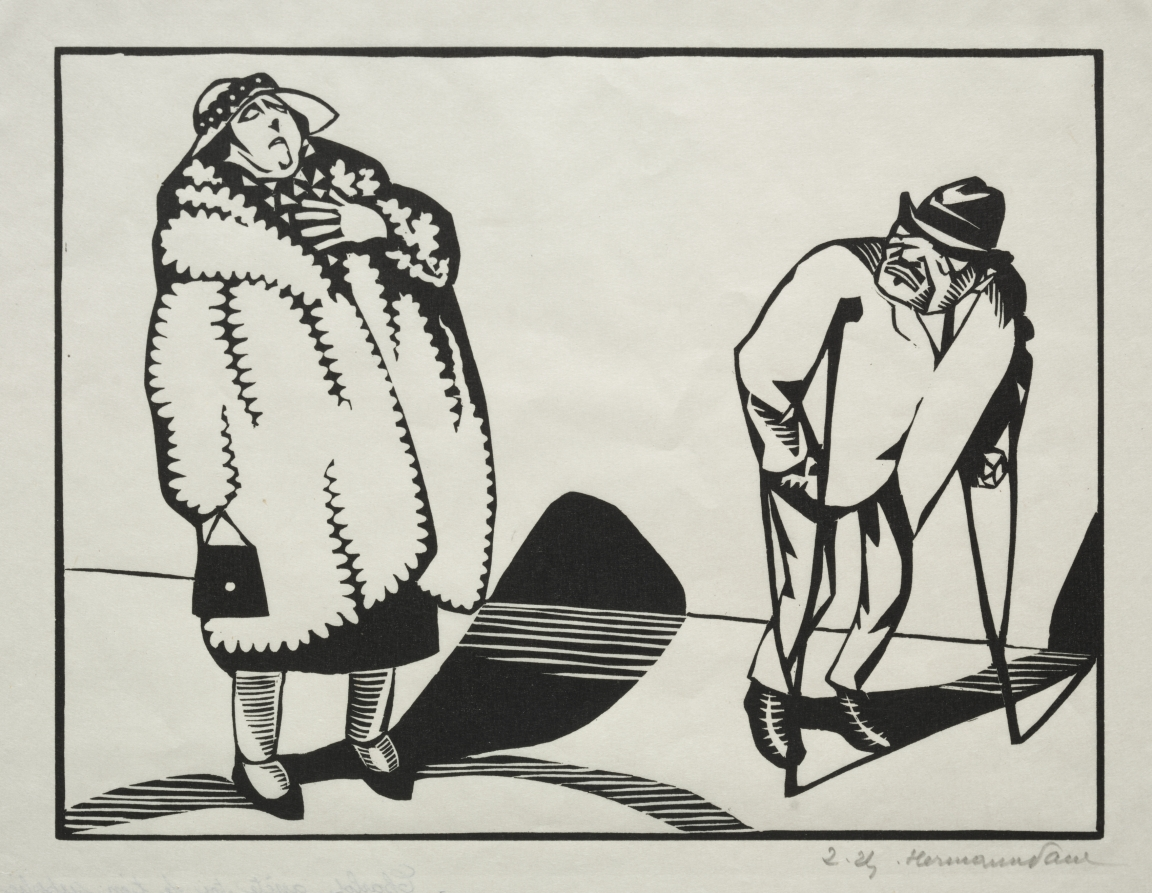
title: Charlot arrête toi je t'en supplie, jai jambres brisées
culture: France, 20th century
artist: Hermann Paul (French, 1864–1940)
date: c. 1920s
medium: woodcut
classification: Print